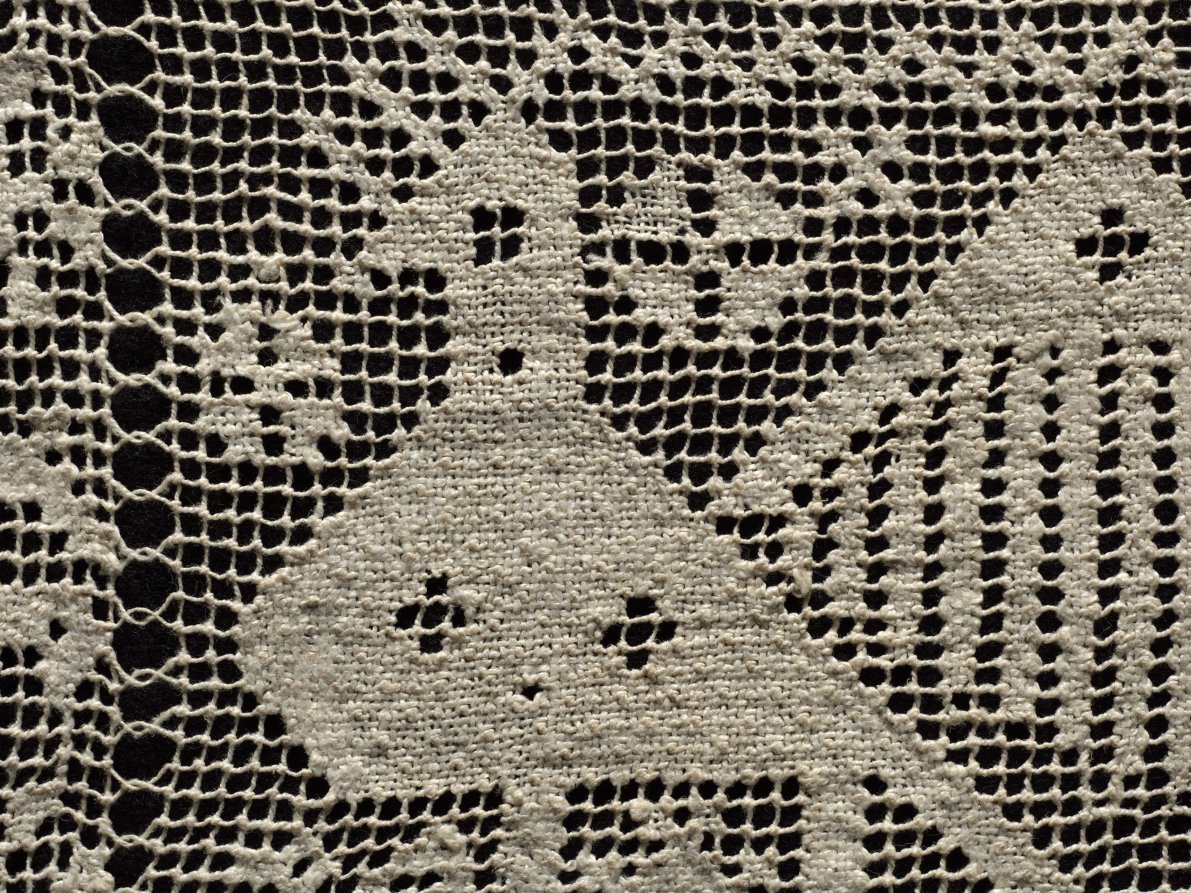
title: Panel with Birds, Flowers, and Suns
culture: Italy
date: 1500s–1600s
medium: Bleached linen (est.): needle lace, filet/lacis (knotted ground and darned in two directions)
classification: Lace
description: The repeated sun and cross motifs, representing Christ and the Crucifixion, suggest this lace panel may have been used to ornament a Christian vestment, perhaps worn by a clergy member.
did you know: Based on the ancient belief that the peacock’s flesh never decayed, they became a symbol of immortality.